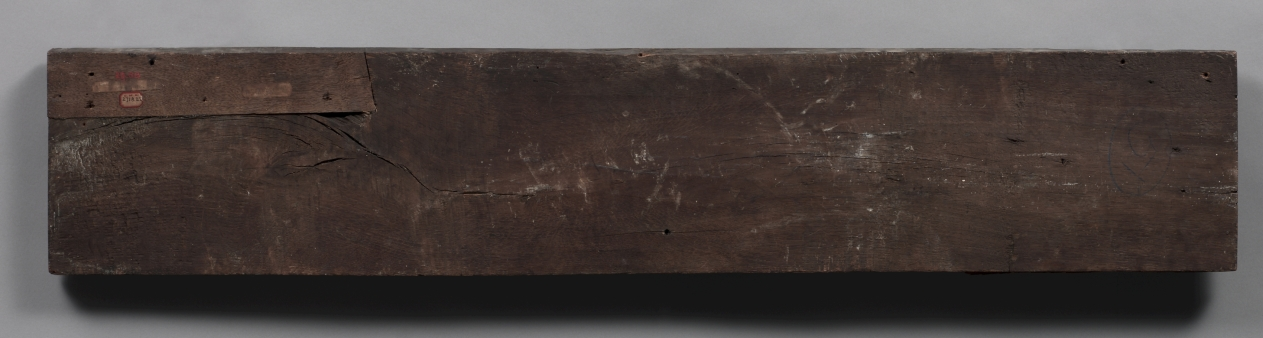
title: Panel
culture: France, Regency Period, 18th Century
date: 1715–1723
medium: wood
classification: Furniture and woodwork